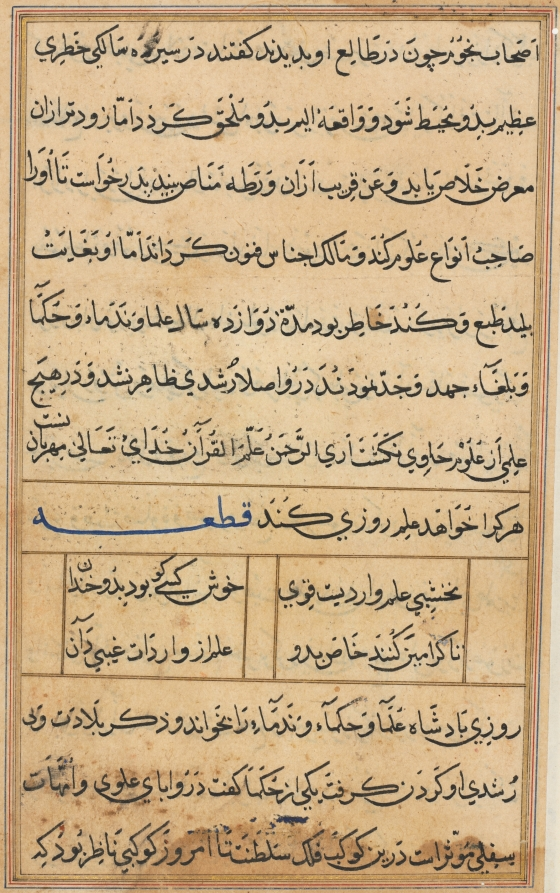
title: Page from Tales of a Parrot (Tuti-nama): text page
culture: Mughal India, court of Akbar (reigned 1556–1605)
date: c. 1560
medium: gum tempera, ink, and gold on paper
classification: Painting